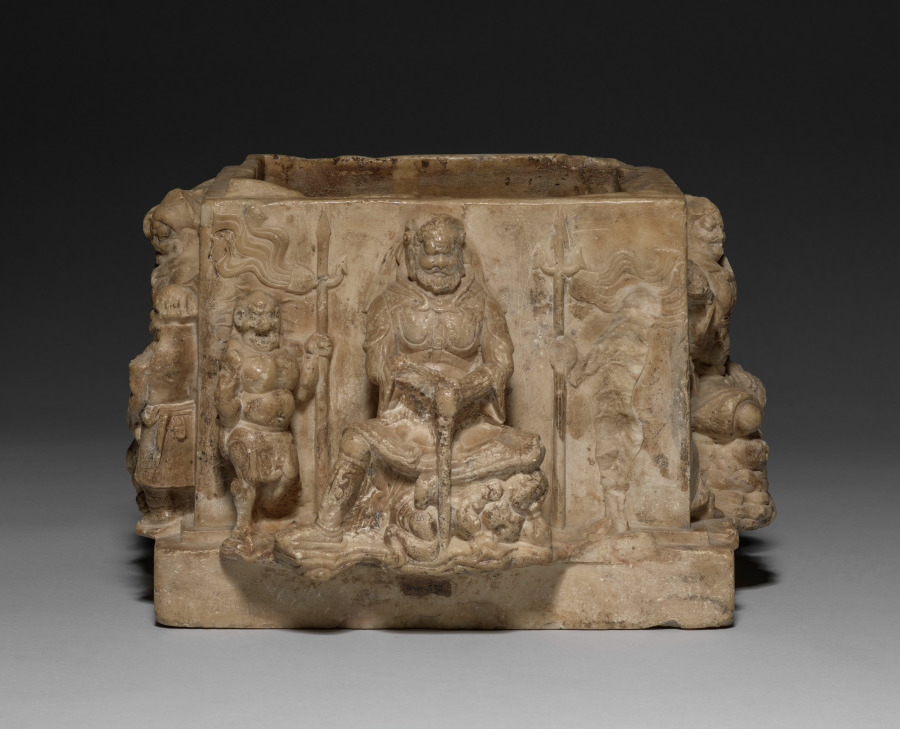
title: Square Urn with Celestial Guardians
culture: China, Tang dynasty (618–907)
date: 700s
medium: marble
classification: Sculpture